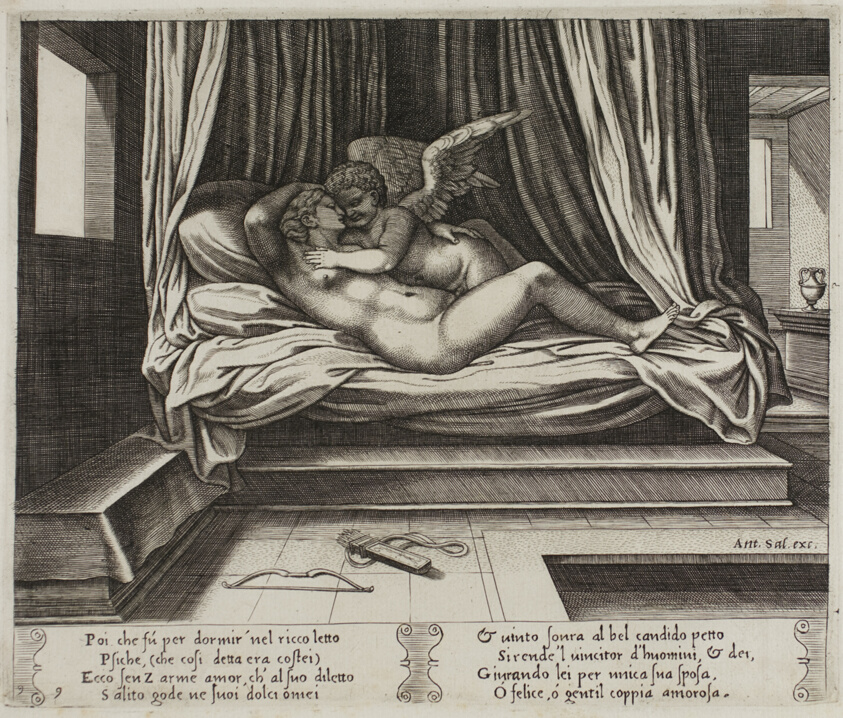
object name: Print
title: Cupid in Psyche's Arms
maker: Master of the Die (Italian, active c. 1530-1560); after Michiel Coxcie I (Flemish, 1499-1592); in turn, inspired by Raffaello Sanzio, called Raphael (Italian, 1483-1520)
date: 1530/40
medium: Engraving in warm brown ink on cream laid paper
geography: Italy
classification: engraving; print; prints and drawing